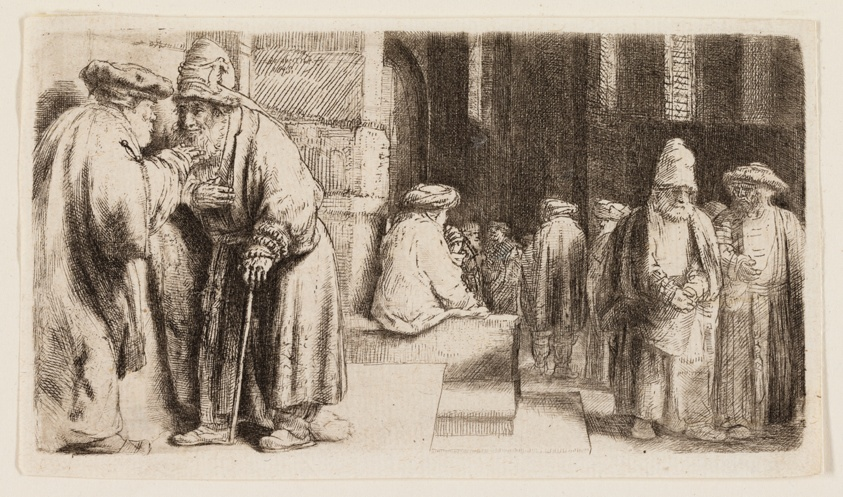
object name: Print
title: Jews in the Synagogue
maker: Rembrandt van Rijn (Dutch, 1606-1669)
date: 1648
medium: Etching and drypoint on ivory laid paper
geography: Holland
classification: etching; print; prints and drawing; paper; drypoint